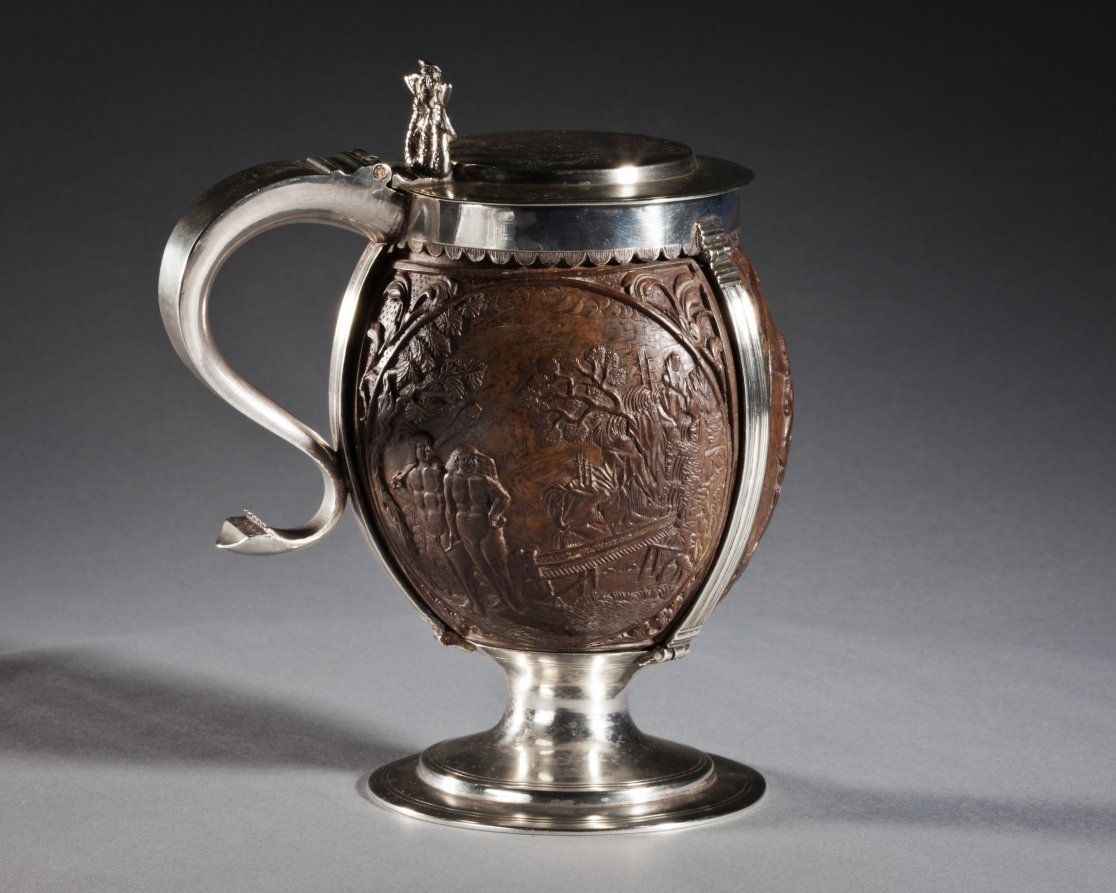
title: Coconut Cup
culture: carved coconut, probably The Netherlands; silver mount, probably England, 17th century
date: c. 1630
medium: carved coconut in silver mount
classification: Metalwork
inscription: top lid has engraved coat-of-arms, underside of lid has inscription: George Lewis TIVERTON Feby, 1st 1760.